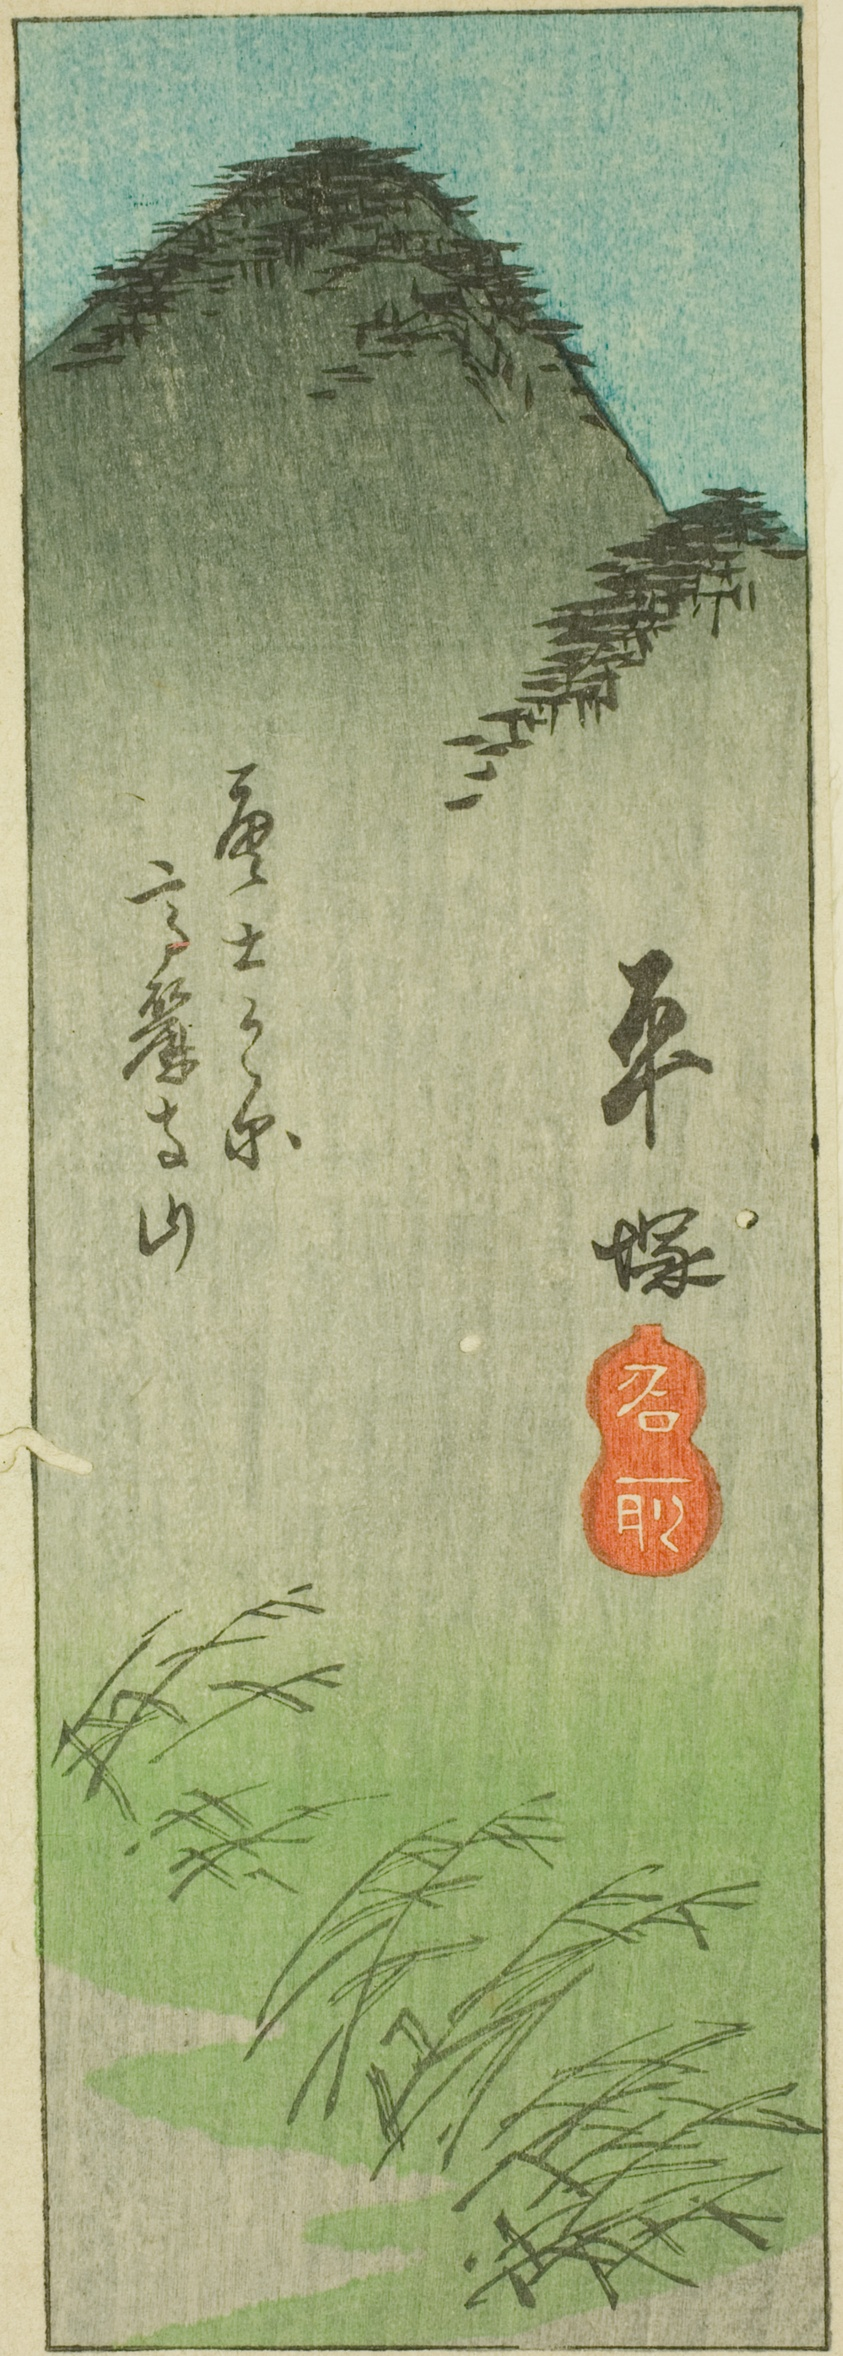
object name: Print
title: Hiratsuka, section of sheet no. 2 from the series "Cutout Pictures of the Tokaido (Tokaido harimaze zue)"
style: Japanese (culture or style)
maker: Utagawa Hiroshige 歌川 広重; Japanese, 1797-1858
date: c. 1848/52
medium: Color woodblock print; section of harimaze sheet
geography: Japan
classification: woodblock print; print; asian art